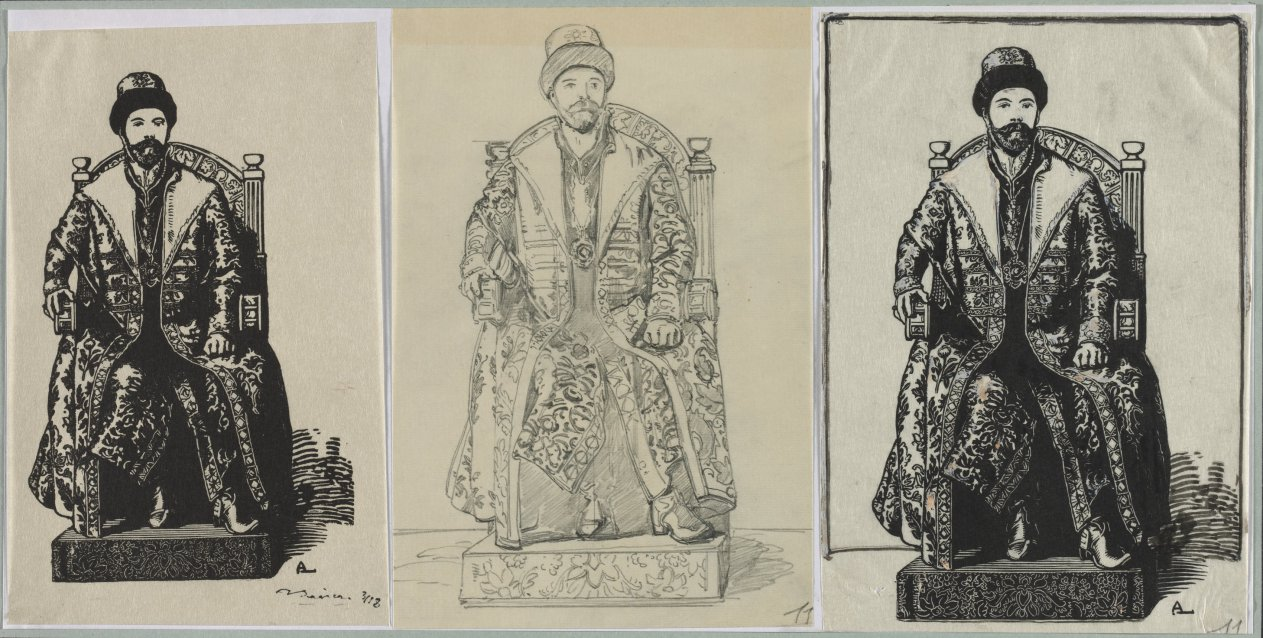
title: Le Tsar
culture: France, 20th century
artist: Auguste Louis Lepère (French, 1849–1918)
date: 1914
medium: pencil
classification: Drawing